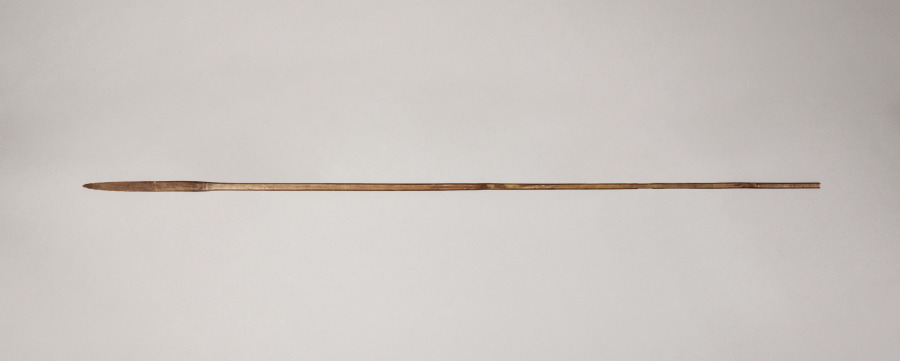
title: Arrow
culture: Philippines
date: before 1922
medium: wood shaft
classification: Arms and Armor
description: This straight, lightweight arrow shaft is made from a single length of bamboo. Its surface is smooth and undecorated, with slight natural tapering toward the point. Shallow notches are cut at the rear end for attaching the bowstring.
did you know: The Aeta people typically used arrows like this one for hunting small game and birds.